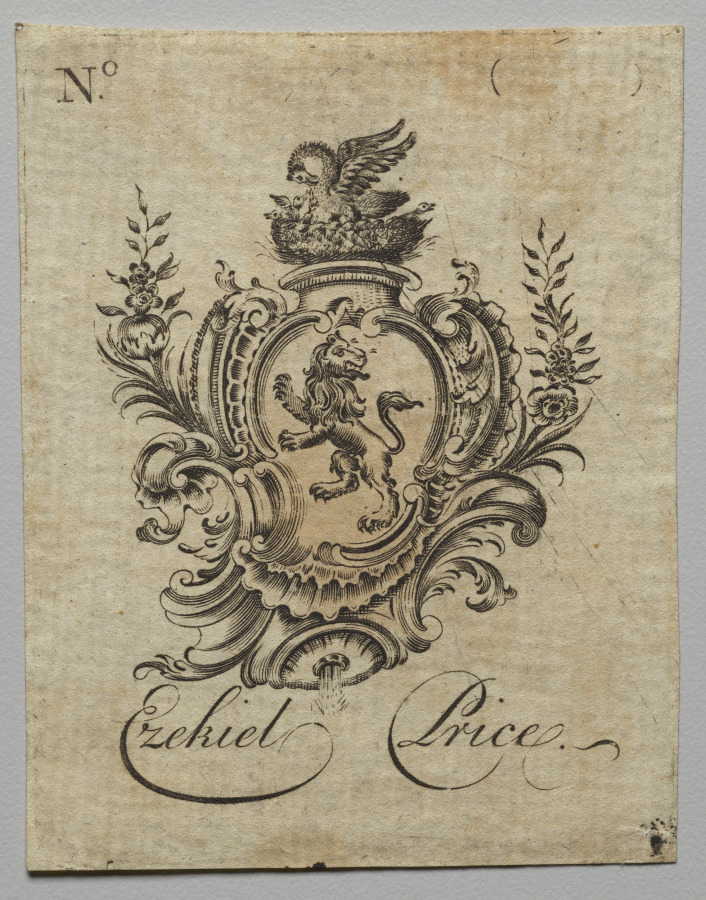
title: Bookplate: Coat of Arms with Ezekiel Price inscribed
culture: America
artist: Nathaniel Hurd (American, 1730–1778)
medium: engraving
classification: Print